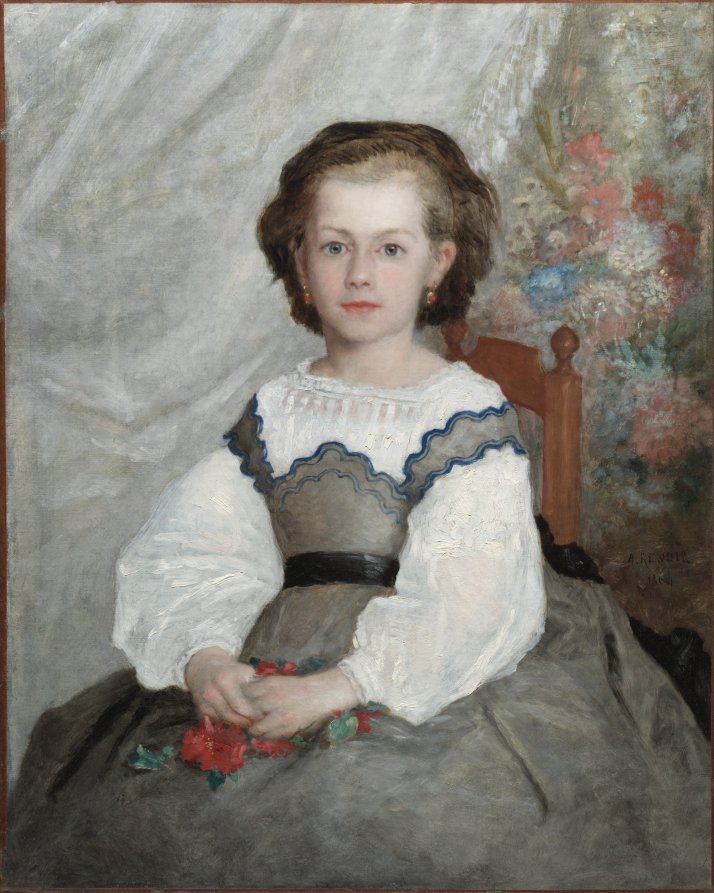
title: Romaine Lacaux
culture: France, 19th century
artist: Pierre-Auguste Renoir (French, 1841–1919)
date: 1864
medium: oil on fabric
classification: Painting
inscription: Signed center right: a. renoir / 1864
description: This painting may be Renoir's earliest signed canvas. Its sensitive display of color and light communicates an ideal of delicate, youthful beauty. The luminous tones of the background drapery and of the child's white blouse result from the artist's careful observation of reflected light and color on translucent materials. The delicate nuances of color, particularly in the young girl's face, reveal Renoir's previous training as a decorator of porcelain. He painted this portrait, commissioned by the vacationing Lacaux family, during his stay at an artist's colony in the village of Barbizon, near Paris.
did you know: The son of a poor tailor from Limoges, Renoir began his artistic career at age 13 as an apprentice to a porcelain painter.